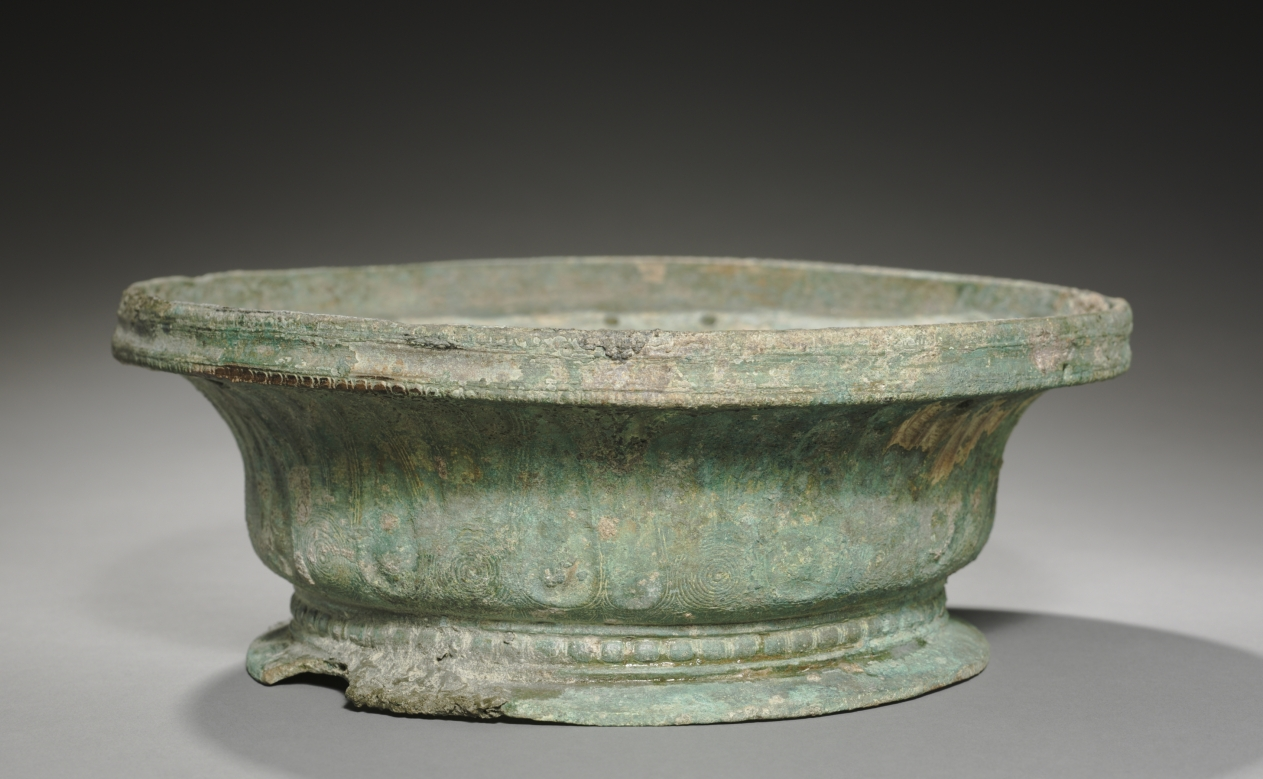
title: Bronze Volute Krater Base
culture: Greece, Laconia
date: late 600s BCE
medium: bronze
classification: Metalwork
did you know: This object supported a large vessel used for mixing wine with water called a krater.